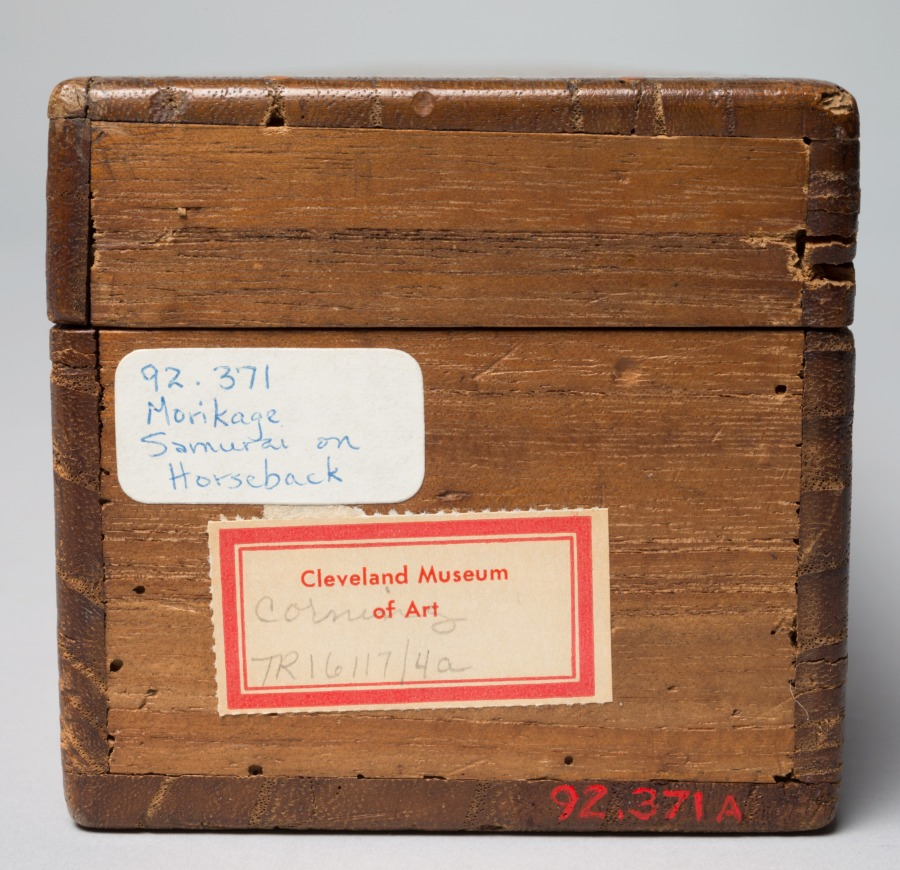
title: A Samurai on Horseback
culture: Japan, Edo period (1615–1868)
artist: Kusumi Morikage (Japanese, active c. 1620–1690)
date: mid- to late 1600s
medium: hanging scroll; ink and slight color on paper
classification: Painting